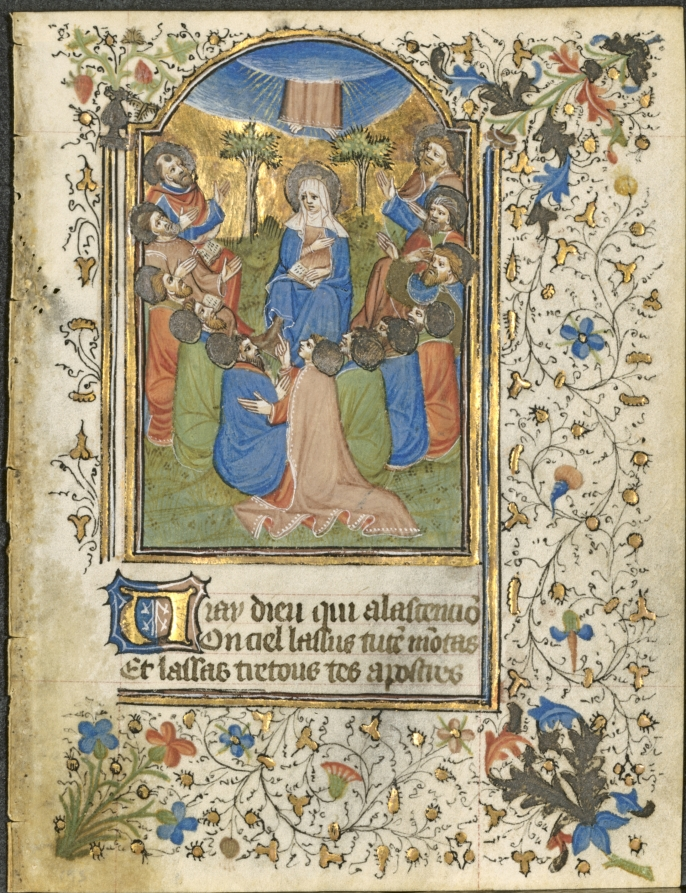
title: The Ascension: Leaf from a Book of Hours (4 of 6 Excised Leaves)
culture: France, Metz, 15th century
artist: Henri d'Orquevaulx (French)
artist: or Workshop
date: c. 1420–30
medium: ink, tempera, silver, and gold on vellum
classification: Manuscript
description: This leaf survives from what must have been an extraordinarily rich book of hours. The elaborate Passion cycle and Suffrages point to an important patron. Internal evidence within the original calendar and texts indicates that Metz was the probable place of production. Stylistically, the illuminations appear to come from the workshop of Henri d’Orquevaulx, a documented Metz manuscript painter. Compositionally, structurally, and stylistically, the miniatures suggest strong links to Netherlandish illumination. It is not known whether d’Orquevaulx came originally from the Netherlands or whether he simply worked or trained there at some point in his career.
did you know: Mostly used by women, books of hours are estimated to have been owned by every fourth household at the height of their popularity.